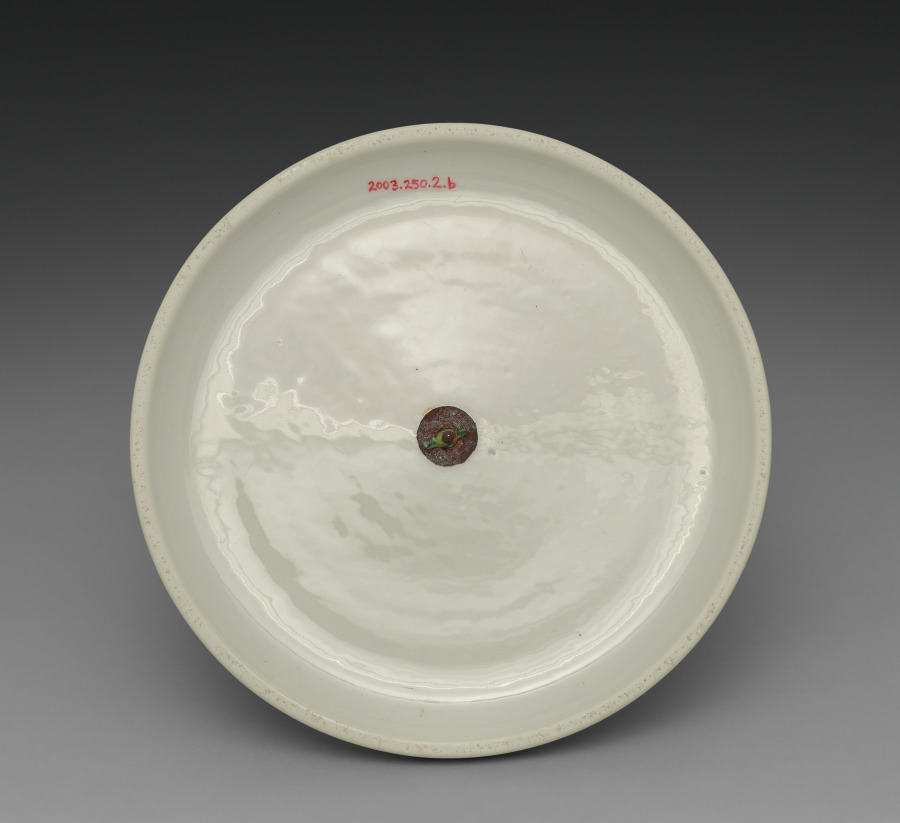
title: Lid for an Ice Cream Pail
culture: France, Paris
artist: Factory of Jacob-Petit (French, 1830–1865)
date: c. 1840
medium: gilt porcelain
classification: Ceramic